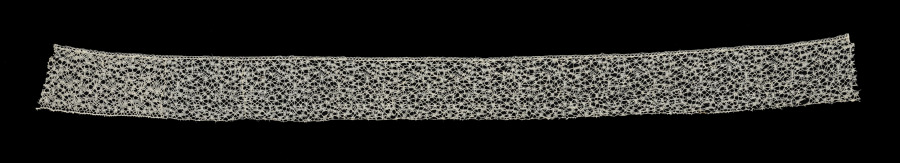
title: Lace Insertion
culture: Belgium, Binche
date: 1700s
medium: Bobbin lace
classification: Lace